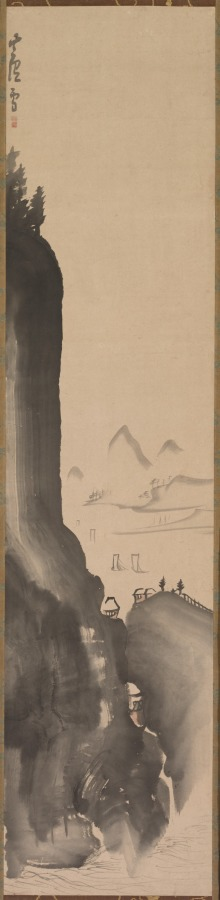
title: Mountains and Distant Boats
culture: Japan, Edo period (1615–1868)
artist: Nagasawa Rosetsu (Japanese, 1754–1799)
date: late 1700s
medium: hanging scroll; ink and slight color on paper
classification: Painting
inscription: Signed: 蘆雪; Sealed: 引裾